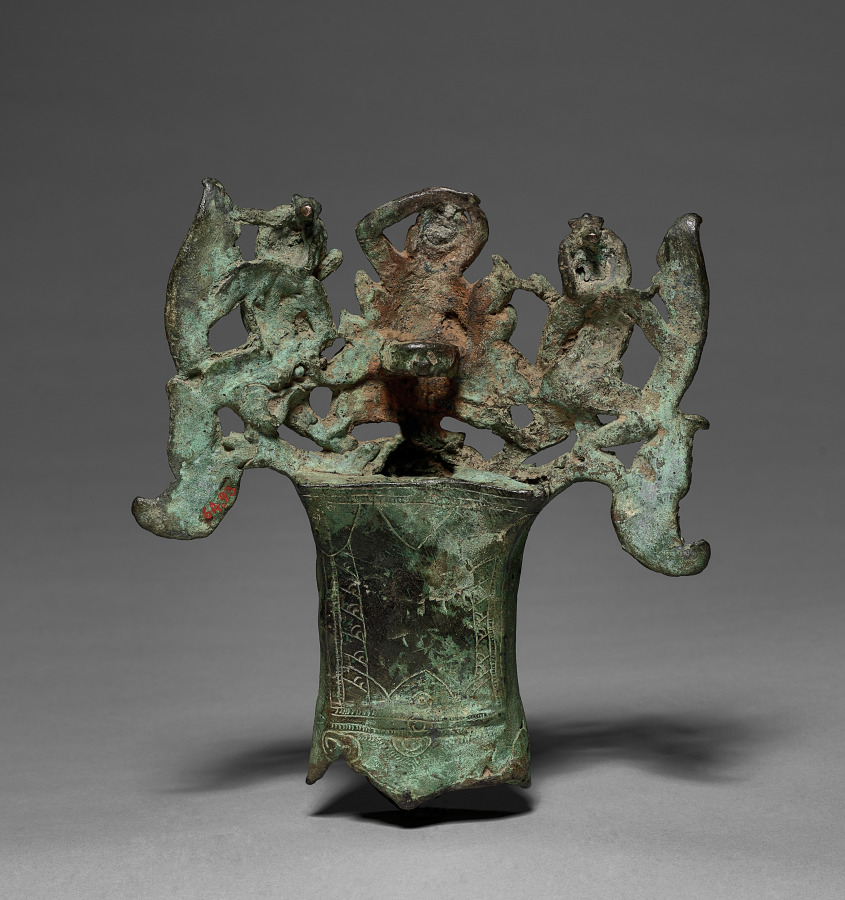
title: Finial with the temptation of Buddha by Mara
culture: Cambodia, reign of Jayavarman 7th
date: late 1100s–early 1200s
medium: bronze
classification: Sculpture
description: The Buddha sits surrounded by a circle of flaming jewels and full-blown lotus petals. Two rearing serpents emblematic of the glory of the Khmer Empire emerge from either side of his lotus pedestal. The Buddha’s right hand points down in the earth-touching gesture, and his left hand holds a round object, probably a special rice offering that indicates the Buddha’s power to ensure ongoing prosperity of the land. The branches of the pipal tree under which the Buddha reached enlightenment top the composition. Beneath his lotus pedestal, the earth goddess wrings the waters from her hair that wash away the army of Mara, the grimacing demons holding clubs and shields who flee to either side.